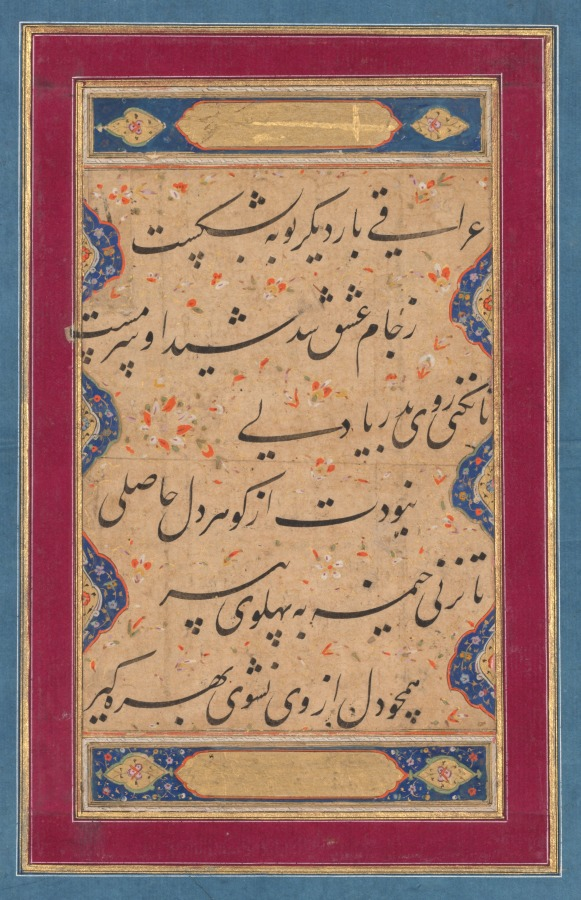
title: Calligraphy from a ghazal of Fakhr al-Din Iraqi (Persian, 1213–1289) and a verse from the Tuhfat al-ahrar (The Gift of the Free) of Abd al-Rahman Jami (verso)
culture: India, Mughal, 18th century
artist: attributed to Muhammad Rizavi Hindi (Indian, active mid-1700s)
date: c. 1760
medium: Gum tempera, ink, and gold on paper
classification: Calligraphy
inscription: verso: Illuminated panel of Persian poetry in nast'aliq calligraphy. Two poems: a ghazal of ‘Iraqi (Persian, 1213–1289) and an anonymous mystical verse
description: The first two lines in Persian read: Once again, Iraqi broke his vows: From the cup of love he became intoxicated and ecstatic. The excerpt from the mystic poet Jami is more of a pious injunction: Until you are bold enough to take to the seas, You will not reap spiritual benefits from your inner heart. Unless you pitch your tent next to the spiritual guide, You will not enjoy him to the fullest.